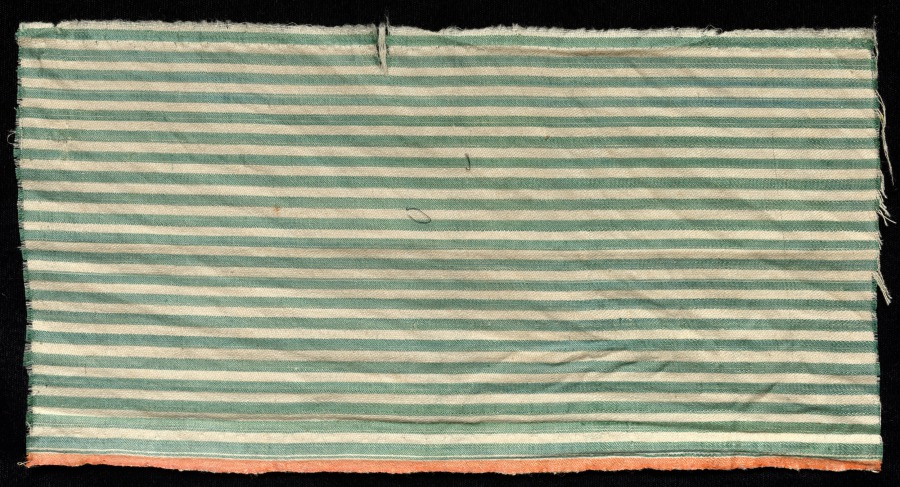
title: Fragment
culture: India, Surat, 19th century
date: 1800s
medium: cotton and silk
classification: Textile